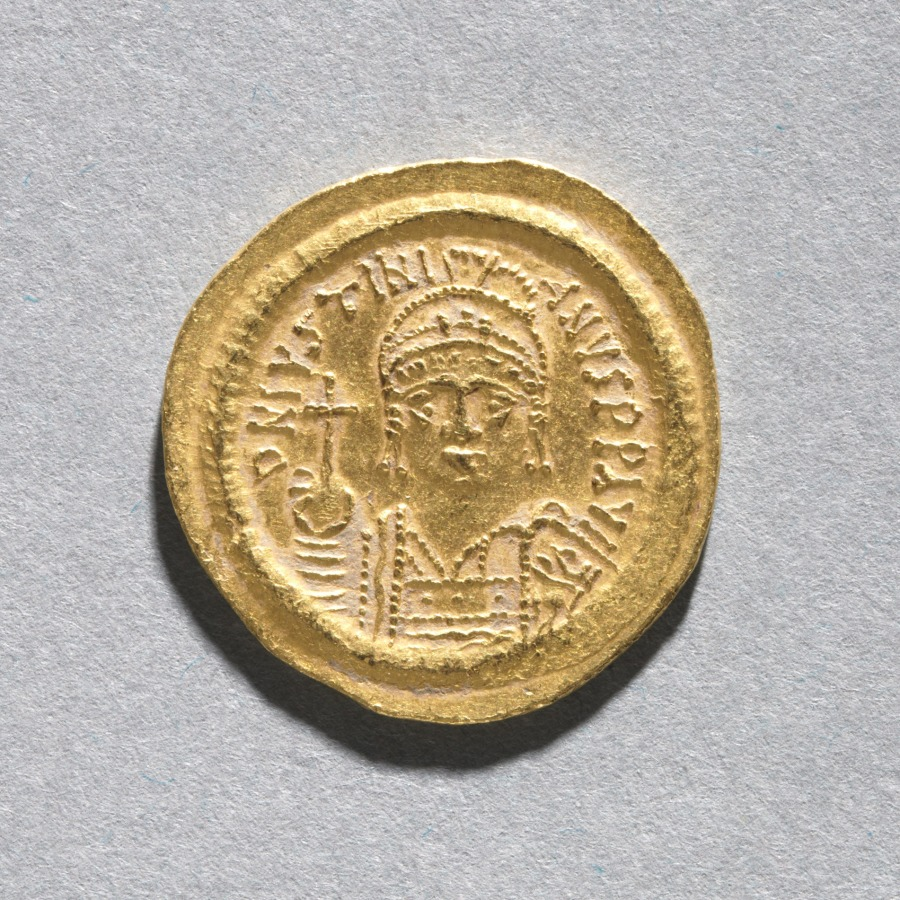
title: Solidus of Justinian I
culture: Byzantium, Constantinople, Byzantine period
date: c. 545–65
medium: gold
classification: Coins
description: The vast number of surviving Byzantine coins attests to the level of trade across the empire. Controlled and supervised by the emperor, the producers of coins took care to represent his authority and reflect his stature. Talented artists were recruited to engrave the dies (molds) used for the striking of coins. Emperors increasingly came to include their heirs and co-emperors on their coinage, as well as other family members or even earlier rulers. Coins were recognized, then as now, as small, portable works of art. With their inscriptions and images, Byzantine coins provide valuable documentation of historical events and a record of the physical appearance of the emperors. The solidus is the basic gold coin of 24 karats; the tremissis, a gold coin of one-third the weight and value of the solidus; and the nomisma, which replaced the solidus as the standard gold coin in the 900s.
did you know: This coin is a small portrait of Justinian as a powerful emperor. He wears a crown, holds an orb, and wears a ceremonial sash, all symbolizing his great power.